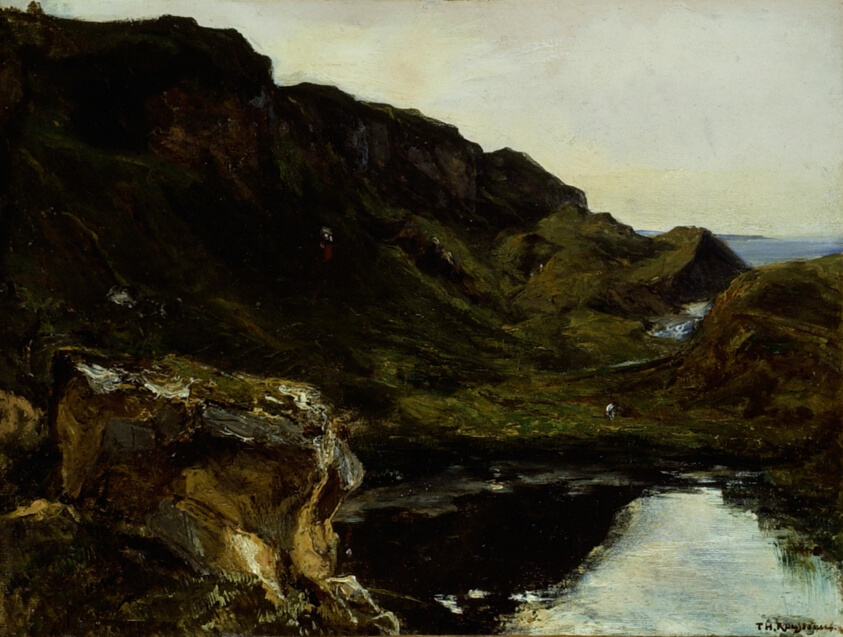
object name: Painting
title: Landscape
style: nineteenth century, 19th century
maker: Théodore Rousseau (French, 1812–1867)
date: c. 1835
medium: Oil on canvas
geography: France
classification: painting; oil on canvas; paint; oil paintings (visual works); french; european painting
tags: landscape, rocks, water, river, lake, figure, wilderness, weather/seasons, trees, sky, nature, landscapes, foliage, clouds